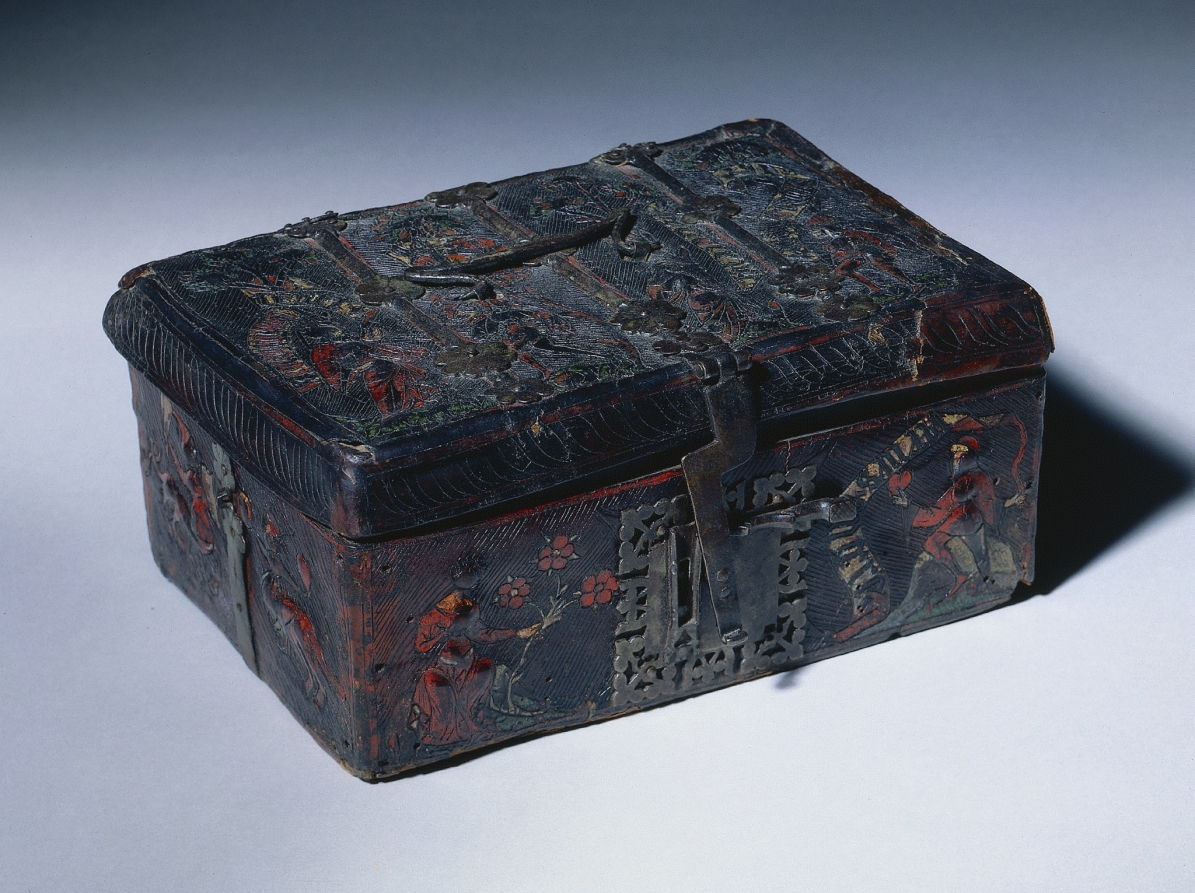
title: Leather Casket with Scenes of Courtly Love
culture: France, Gothic period, 2nd half of the 14th century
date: c. 1350–1400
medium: Leather: embossed, incised; iron mounts; wood core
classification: Leather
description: During the Middle Ages, small boxes like this were produced for the secular market. Used for storing personal items, the boxes typically consisted of a wood core that might be decoratively painted and gilded or covered with another material, such as ivory or leather. Manufactured in small, highly specialized leather workshops, these richly embellished caskets were valued furnishings in the homes of the aristocratic clientele that commissioned them. On the lid of this box, a couple is shown with banderoles inscribed in Old French with expressions of mutual love. "Hold my heart," requests the lady. "But you already have it," replies the man. On the front of the casket, the man, holding a heart, appears again and states, "Have it once more."